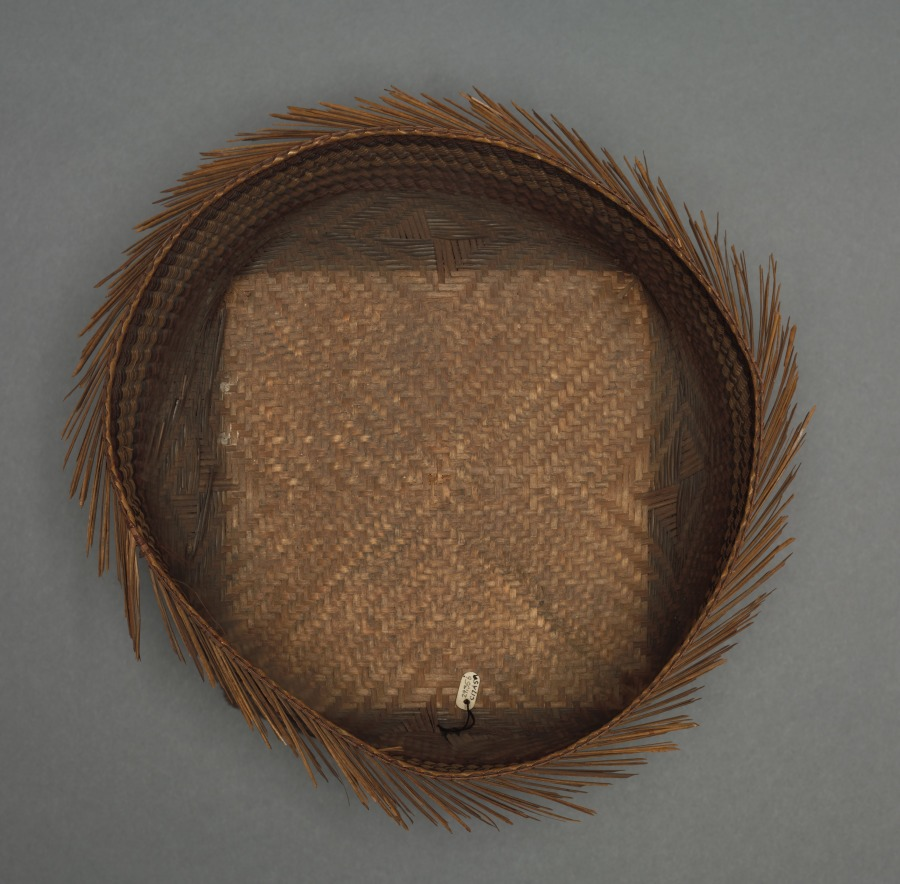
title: Hat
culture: Africa, Central Africa, Democratic Republic of the Congo, Mangbetu-style maker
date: by 1928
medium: Plant fibers and dye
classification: Garment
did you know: This woven hat looks brand new because it was one of the many items the business-savvy chief of Ekibondo had artists and artisans make for the foreigners who passed through his village.